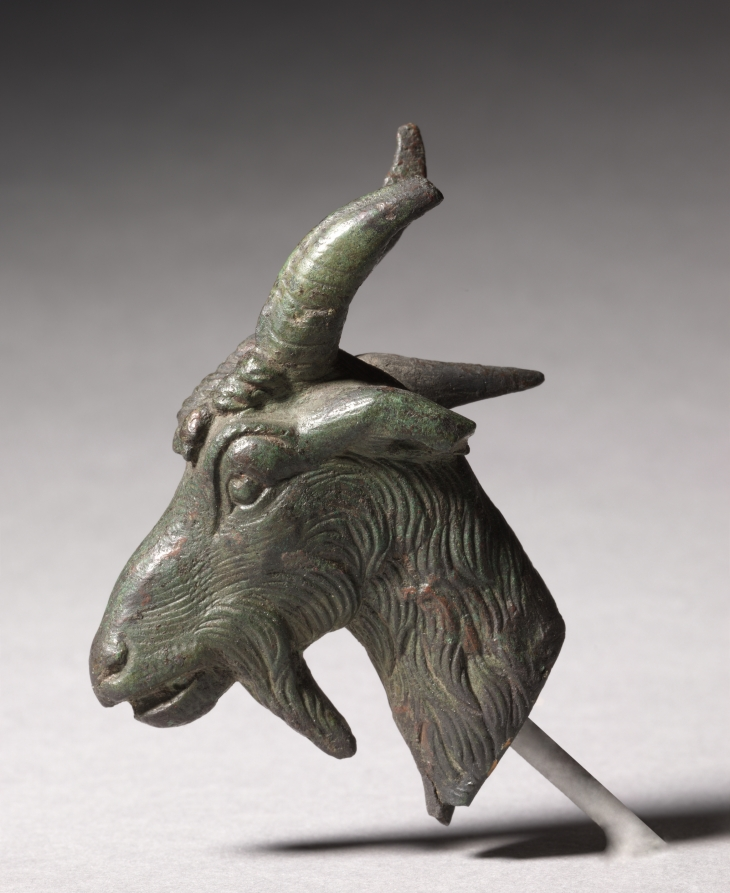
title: Head of a Goat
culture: Greece, Hellenistic period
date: 300–100 BCE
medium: bronze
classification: Sculpture